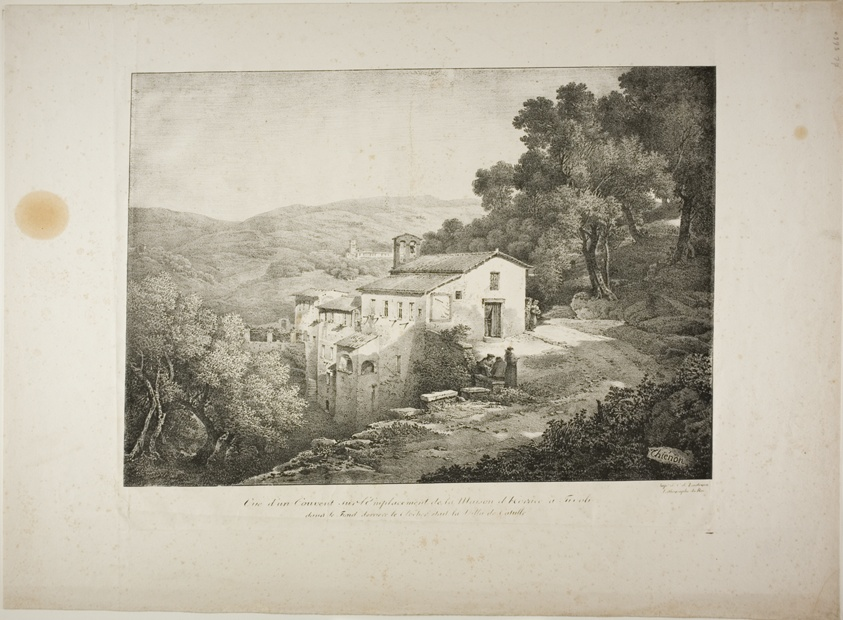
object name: Print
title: View of a Convent on the Site of the House of Horace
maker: Claude Thienon (French, 1772-1846); printed by Comte de Charles Philibert Lasteyrie du Saillant (French, 1759-1849)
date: c. 1817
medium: Lithograph in black on ivory wove paper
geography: France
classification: lithograph; print; prints and drawing